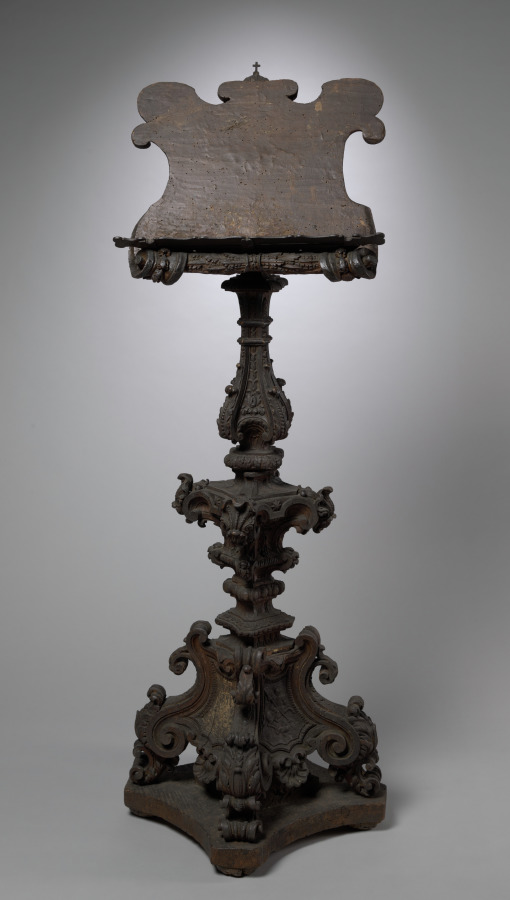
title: Lectern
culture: Italy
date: 1707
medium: wood and gesso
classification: Furniture and woodwork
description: Lecterns of this type were used in Roman Catholic churches and monastery chapels to hold the Bible, from which a priest would read the lessons of scripture and at some points during the liturgy, guide the participants in prayer. The high degree of decoration was achieved by applying plaster gesso to the wooden base allowing for elaborate carving in the same way that a picture frame is worked. Sometimes lecterns bearing the arms of a pope or cardinal like this one were gifts to mark the visit or favor of that official.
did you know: The carved coat of arms on the lectern desk are those of Pope Clement XI, who reigned from 1700 to 1721.